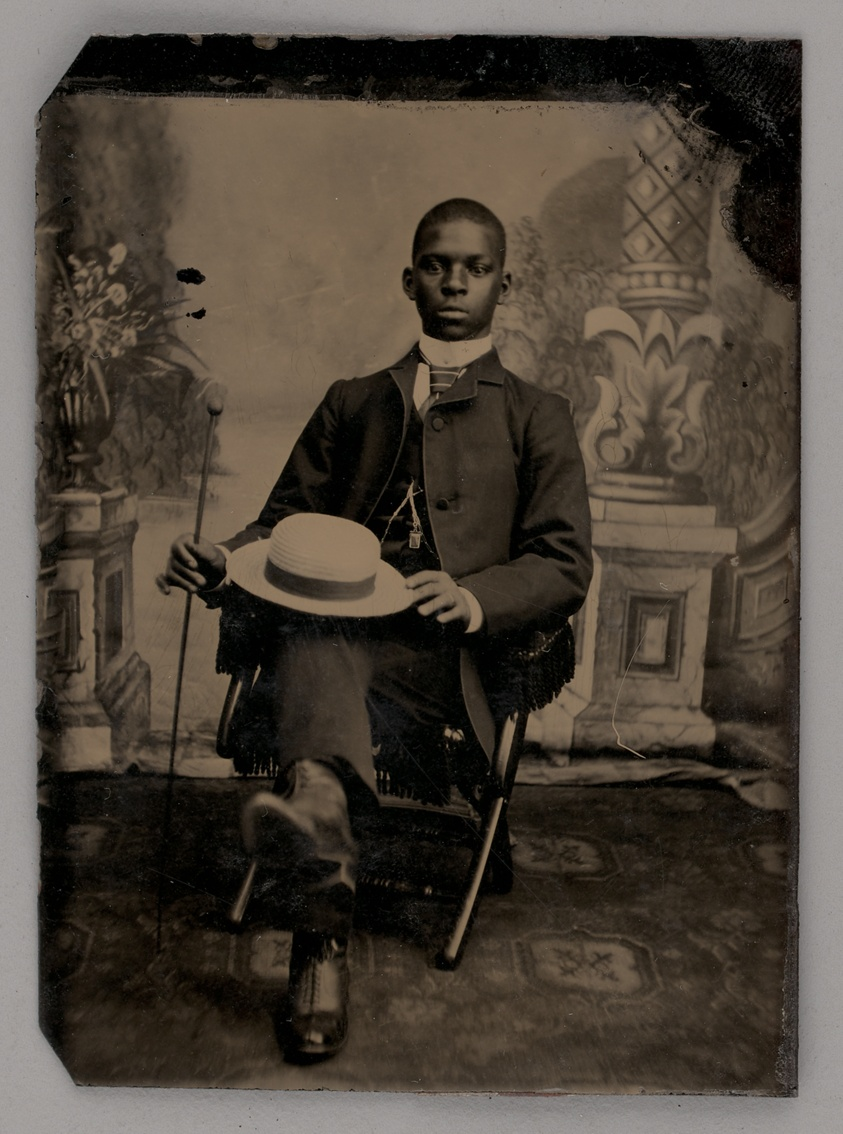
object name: Photograph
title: Untitled (Portait of a Seated Man Holding a Hat)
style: 19th century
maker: Unknown maker; American, 19th century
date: 1875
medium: Tintype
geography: United States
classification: portrait; tintype; photograph; photographic process; photography; portrait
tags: portraits: African American subject, lundberg collection, African American, portraits, Male, men, hats, portrait